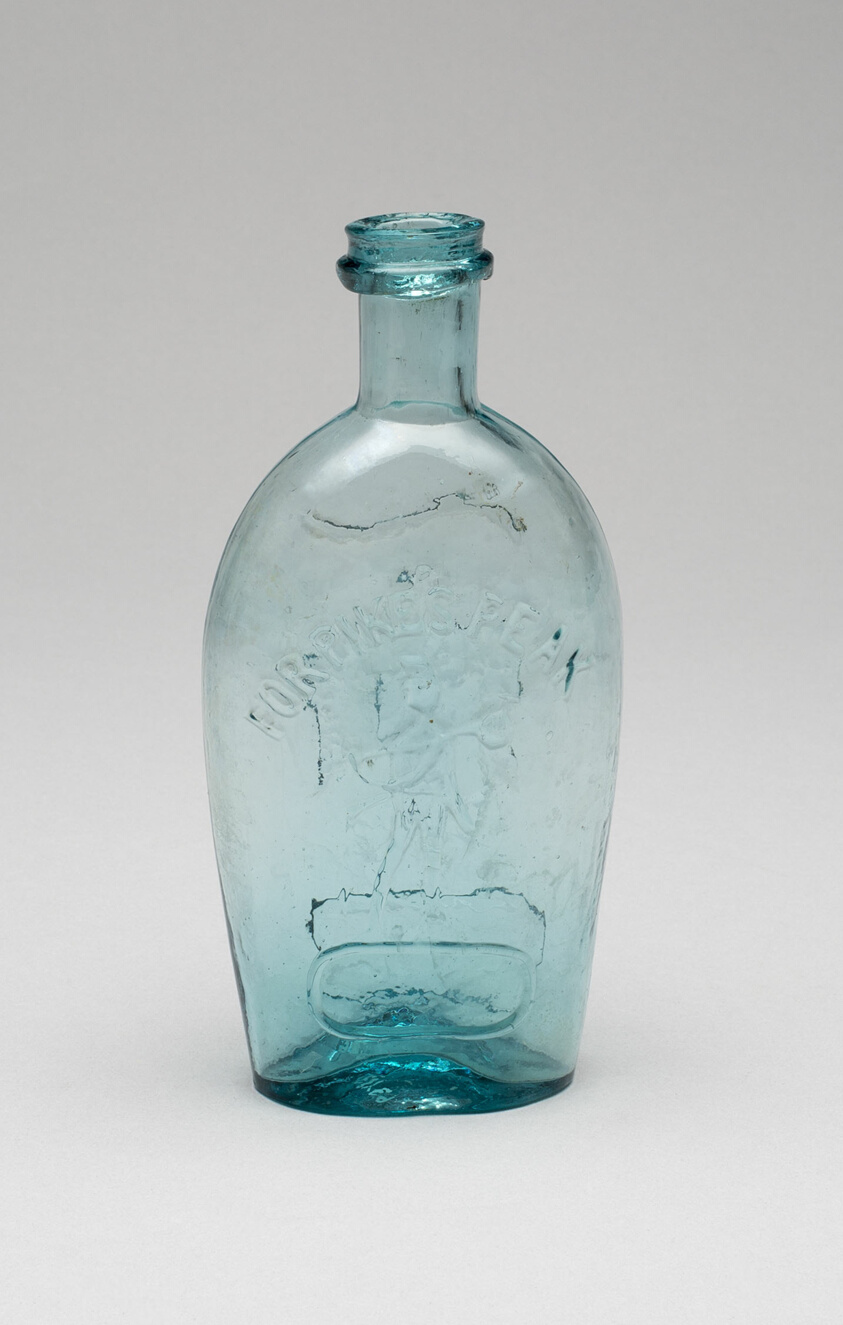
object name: Glass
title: Flask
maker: Artist unknown (American, 19th century); Probably Midwestern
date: 1860–75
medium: Glass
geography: Pittsburgh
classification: flask (bottle); glass; american decorative arts; american arts; decorative arts